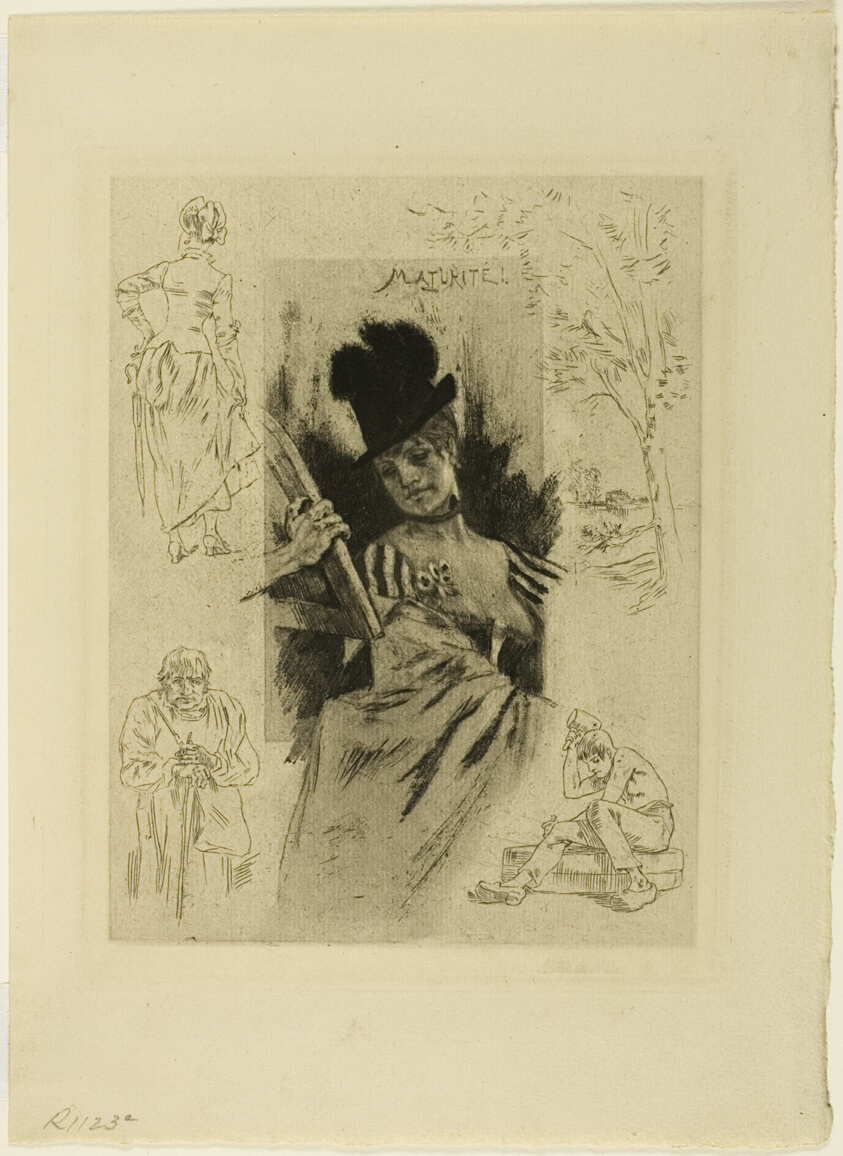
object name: Print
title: Maturity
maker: Félicien Rops (Belgian, 1833-1898)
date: 1887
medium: Aquatint, soft varnish ("vernis mou") and drypoint on cream laid paper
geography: Belgium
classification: aquatint; print; prints and drawing